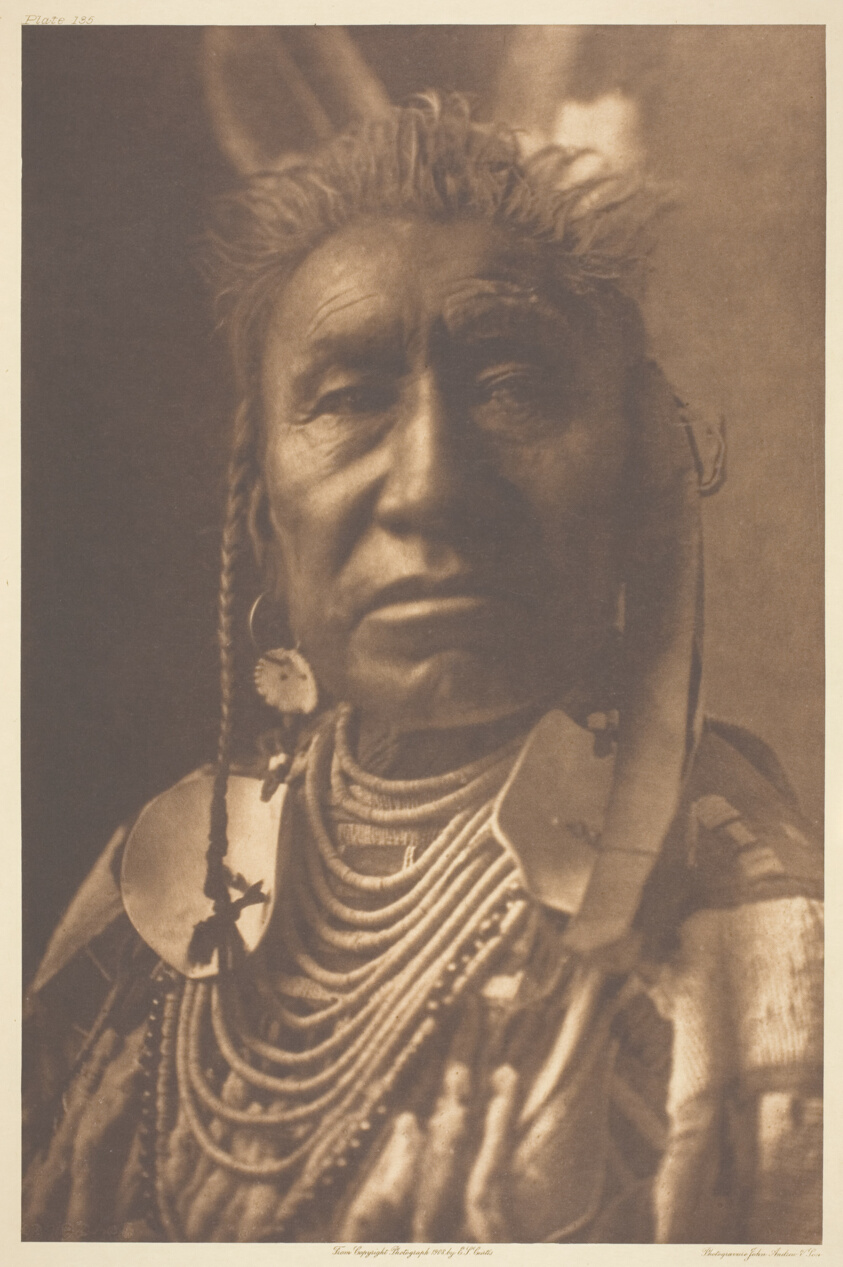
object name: Photograph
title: Fish Shows-Apsaroke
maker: Edward S. Curtis (American, 1868–1952)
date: 1908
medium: Photogravure, plate 135 from "The North American Indian, Volume 4" (1909)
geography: United States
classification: photogravure; photomechanical process; photography; photograph